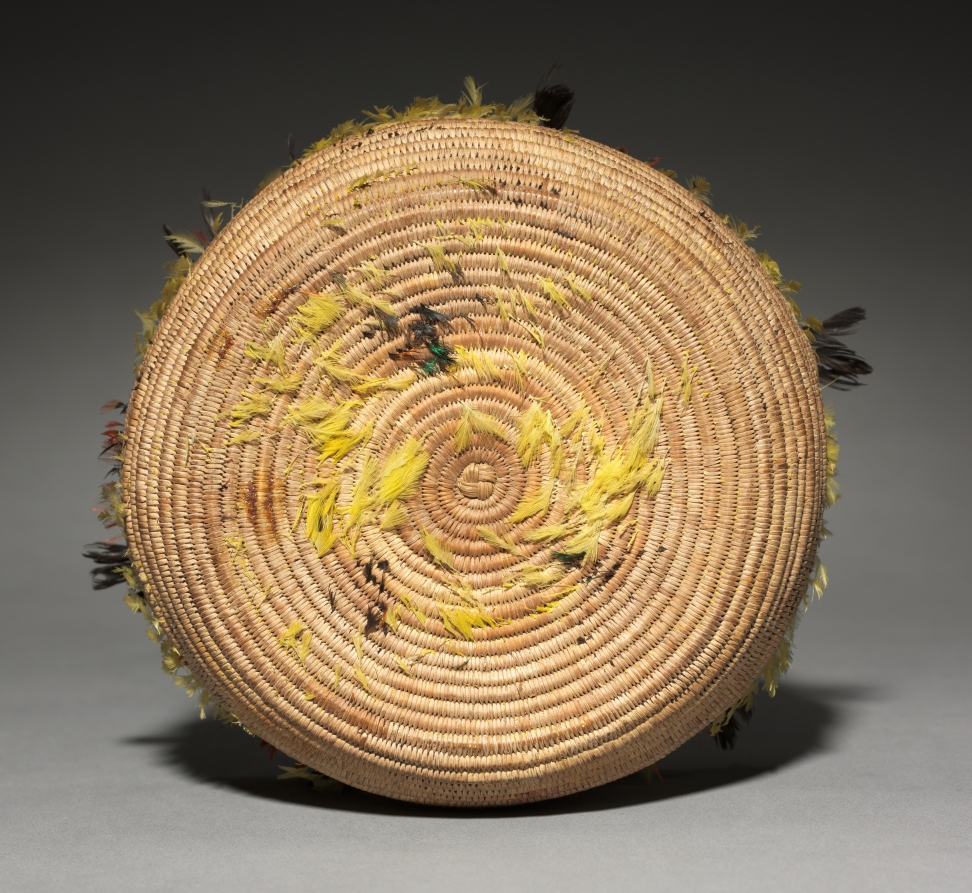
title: Gift Bowl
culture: California, Pomo, Eastern, early 20th century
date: c. 1900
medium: Sedge with Feathers; Coiled (3 rods)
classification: Basketry